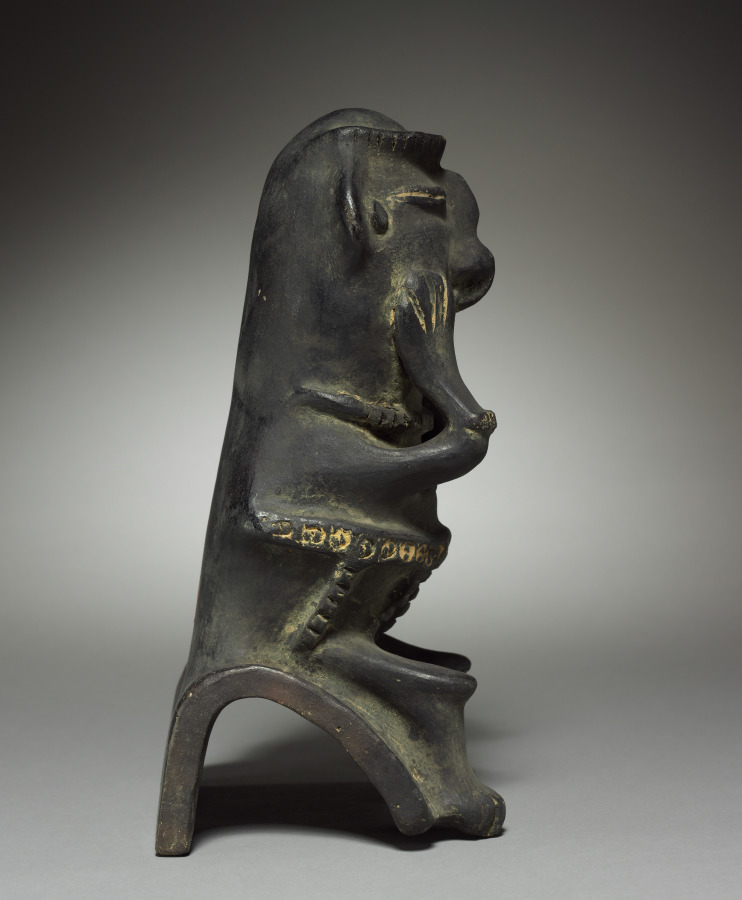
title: Seated Figure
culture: Colombia, Pre-Columbian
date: before 1921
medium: earthenware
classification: Ceramic